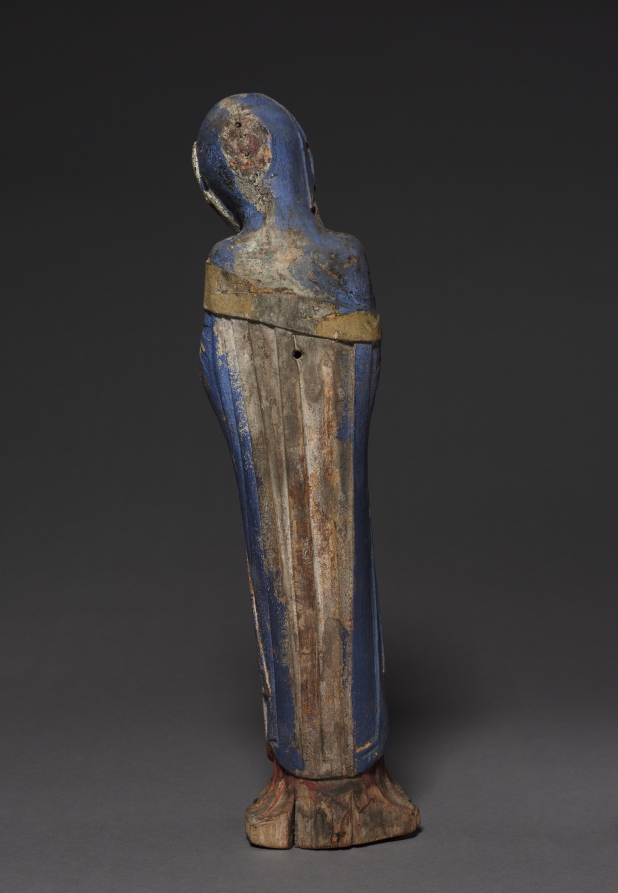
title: Mourning Virgin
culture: Austria, Region of Salzburg, Lungau?, 13th century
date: c. 1240–1260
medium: painted wood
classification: Sculpture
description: These traditional devotional figures at one time formed a Crucifixion group with a Crucified Christ (now lost). The ensemble may have been mounted high above the entrance to the sanctuary of a church on a barrier called a rood beam, beyond which lay people were not allowed. Crucifixion groups were common in medieval churches where they symbolized the sacrifice and real presence of Christ in the Mass.